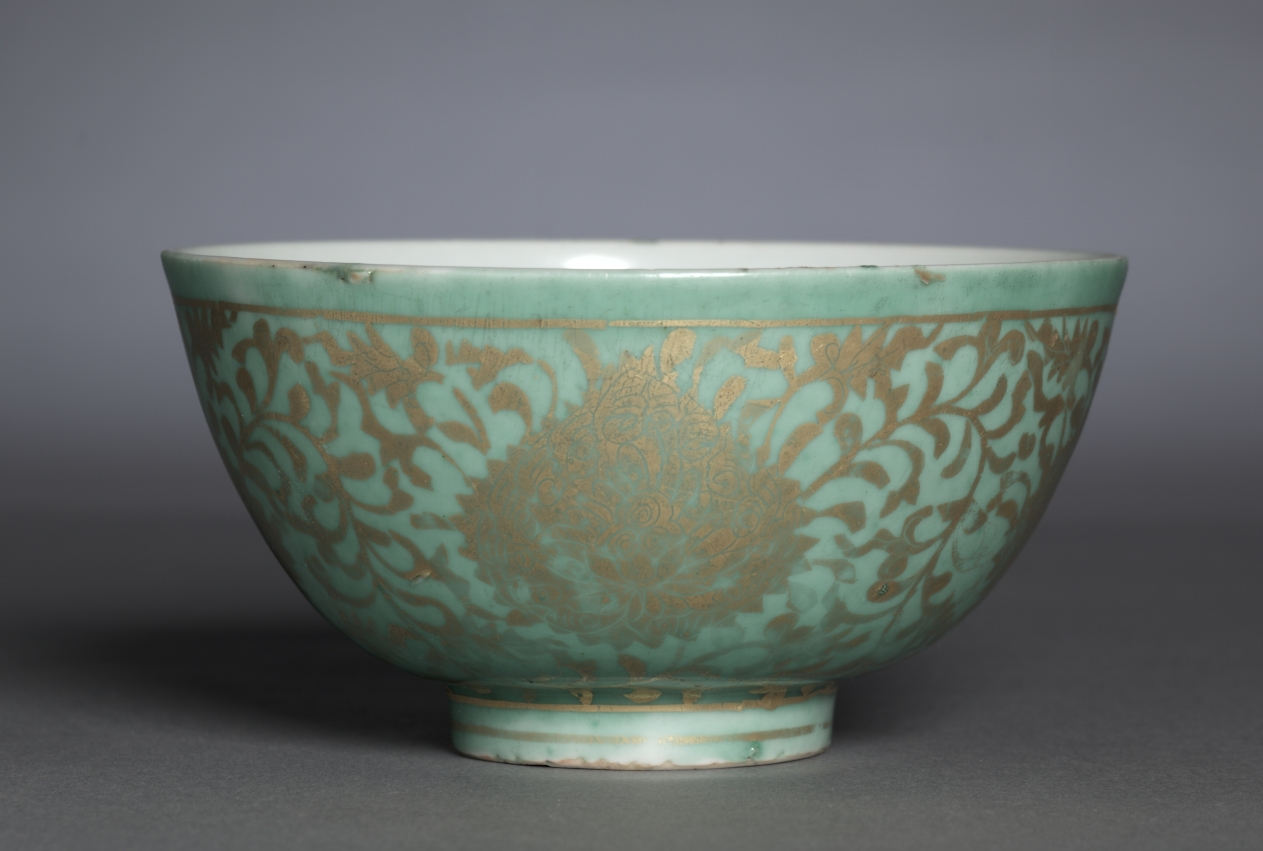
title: Bowl with Lotus Scrolls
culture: China, Jiangxi Province, Jingdezhen kilns, Ming dynasty (1368–1644)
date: 1500s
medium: porcelain with burnished and engraved gold (kinrande) decoration on green overglaze enamel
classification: Ceramic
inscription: Fine vessel for the rich and honorable (fugui jiaqi)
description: Bowl such as this, with kinrande (gold-engraved) decoration over monochrome enamels, may have been made originally for export to Japan. On the base of this bowl are an underglaze blue inscription, reading "Fine vessel for the rich and honorable (fugui jiaqi)," as well as a modern registration mark "PDF A552" to indicate that it was formerly in the Sir Percival David collection in London. A similar kinrande bowl can be found in the Percival David Foundation, PDF A549.